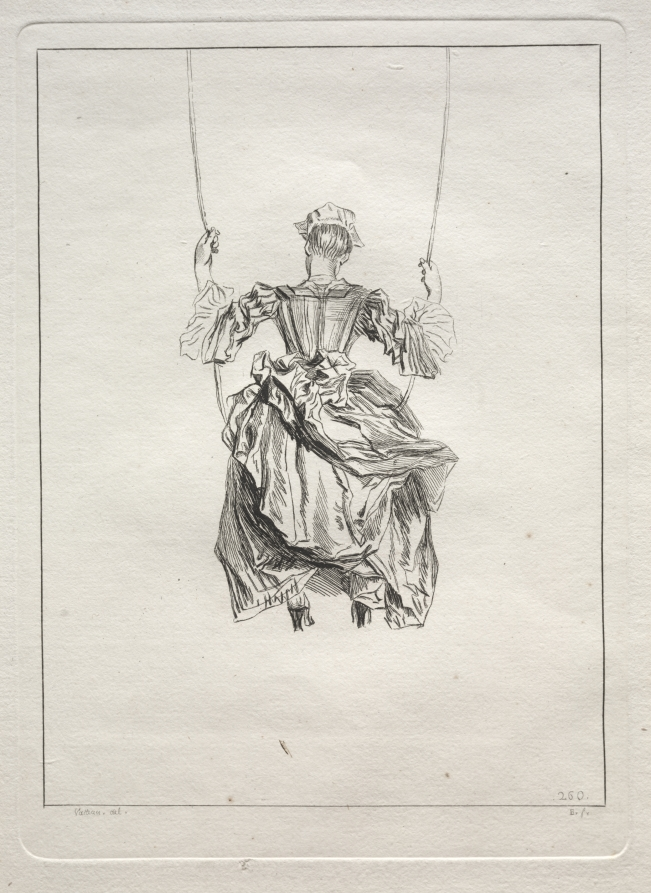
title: Woman on a Swing, Viewed From Behind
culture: France, 18th century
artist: François Boucher (French, 1703–1770)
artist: after Jean-Antoine Watteau (French, 1684–1721)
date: c. 1721–28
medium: etching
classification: Print